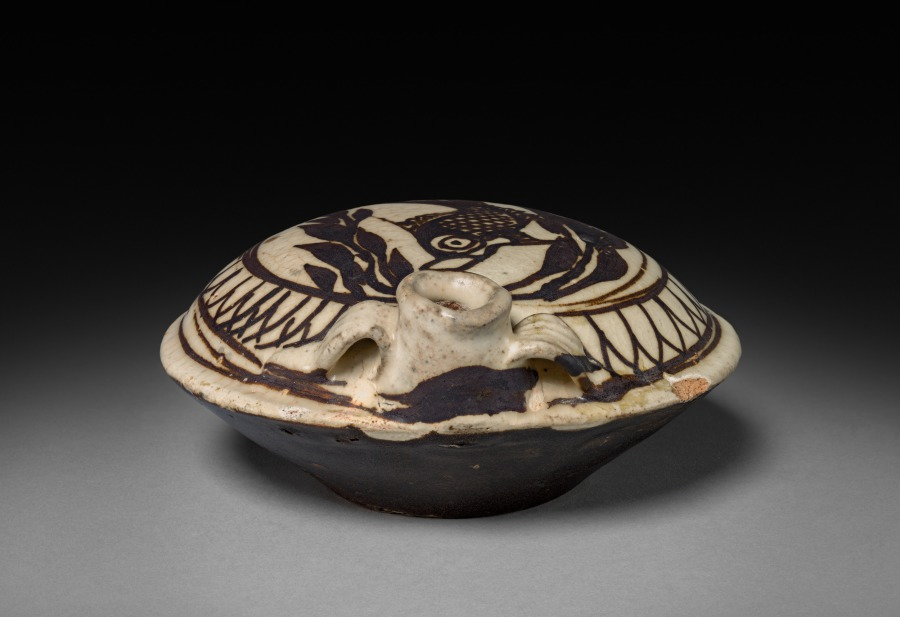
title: Water Dropper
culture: China, Yuan dynasty (1271-1368)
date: 1271–1368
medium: Stoneware, Cizhou ware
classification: Ceramic